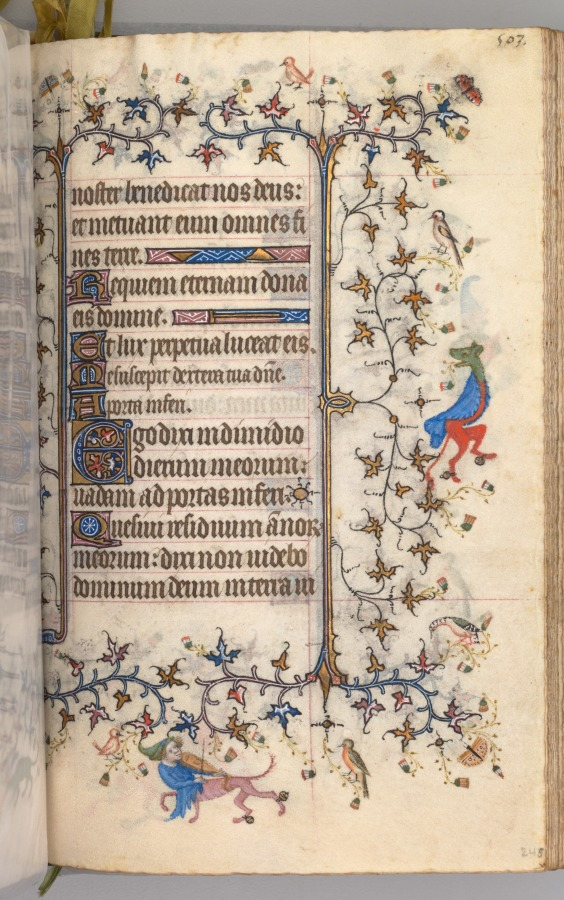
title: Hours of Charles the Noble, King of Navarre (1361-1425): fol. 246r, Text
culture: France, Paris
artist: Master of the Brussels Initials and Associates (French)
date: c. 1405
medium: ink, tempera, and gold on vellum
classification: Bound Volume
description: This precious volume was obviously highly prized by its owner, the French-born King of Navarre, who had his coat of arms painted on no less than twenty folios. Rather than directly commissioning this manuscript from a specific workshop, it seems that Charles the Noble acquired his book of hours -- perhaps ready-made for the luxury market -- while on a trip to Paris in 1404-05. A collaborative effort, six painting styles are evidenced within the pages of this codex, those of two Italians, two Frenchmen, and two Netherlanders. The painter who was responsible for the planning and decoration of the book, and who produced seventeen of the large miniatures, was a Bolognese artist known as the Master of the Brussels Initials. His principal assistant, responsible for most of the borders, was a Florentine who signed his name "Zecho" da Firenze on folio 208 verso.